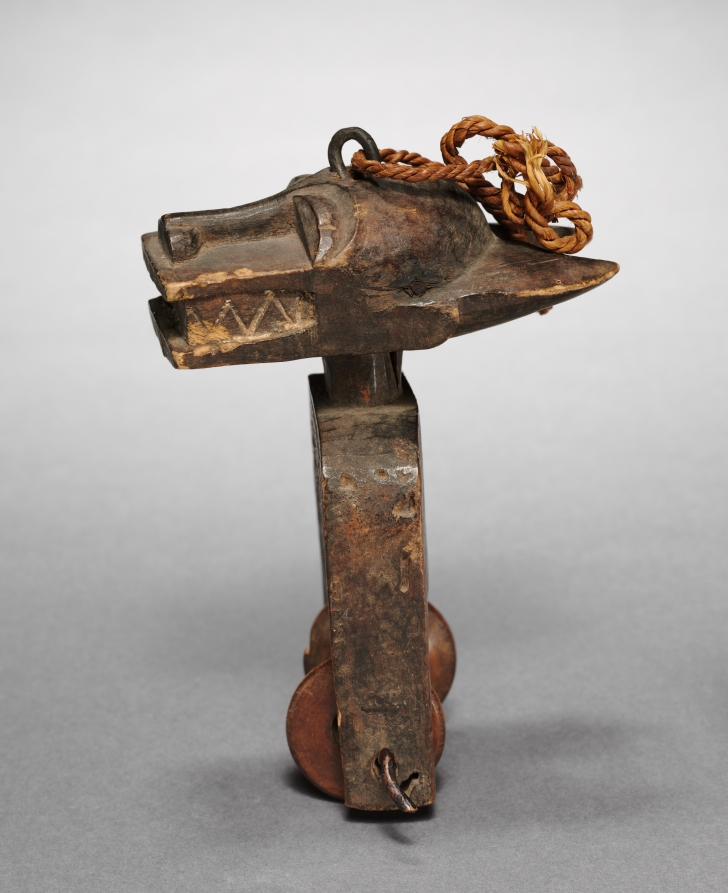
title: Heddle Pulley (Bo Nun Amuin mask)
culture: Africa, West Africa, Côte d’Ivoire, Baule-style carver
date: 1900s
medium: Wood, metal, and plant fiber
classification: Implements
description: The heddle pulley, a working element of a narrow-band loom, bears a miniature sculpture. Heddle pulleys support and separate threads during weaving. Mounted above the weaver, the pulleys allow him to glance up at an object of inspiring beauty, rather than pure functionality. This pulley depicts a face mask, a secular usage of a typically sacred mask type.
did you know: This heddle pulley depicts a fearsome Bo Nun Amuin mask that recalls nature spirits.